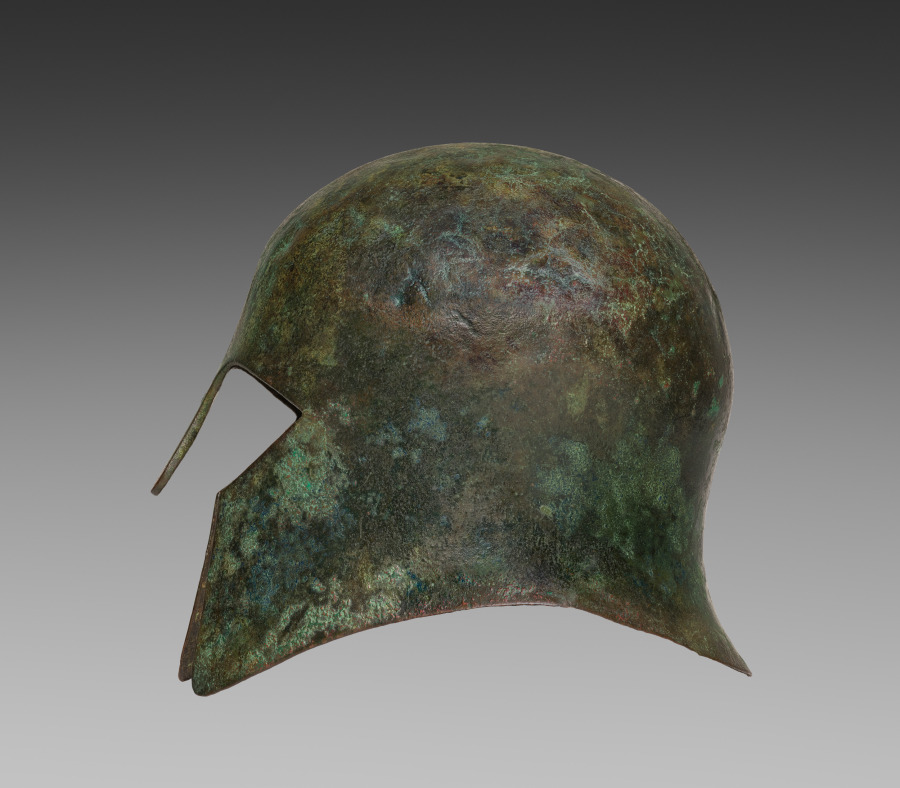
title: Corinthian Helmet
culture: Greek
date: c. 625–550 BCE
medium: Bronze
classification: Arms and Armor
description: This remarkably well-preserved bronze helmet belongs to an iconic type known as Corinthian yet produced far beyond the city of Corinth. Designed for use by hoplite warriors, who fought with spears and shields in shoulder-to-shoulder (phalanx) formation, such helmets provide maximum protection but limited vision, hearing, and movement. Probably first cast and then hammered into its final shape, the helmet features both gentle curves and sharp angles, evoking the head and face that it protected. Similar helmets appear frequently on warriors shown in ancient art, though often with crests of horsehair or other organic materials that no longer survive.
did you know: A small hole above the rear neckline, now repaired, may reflect a fatal blow.